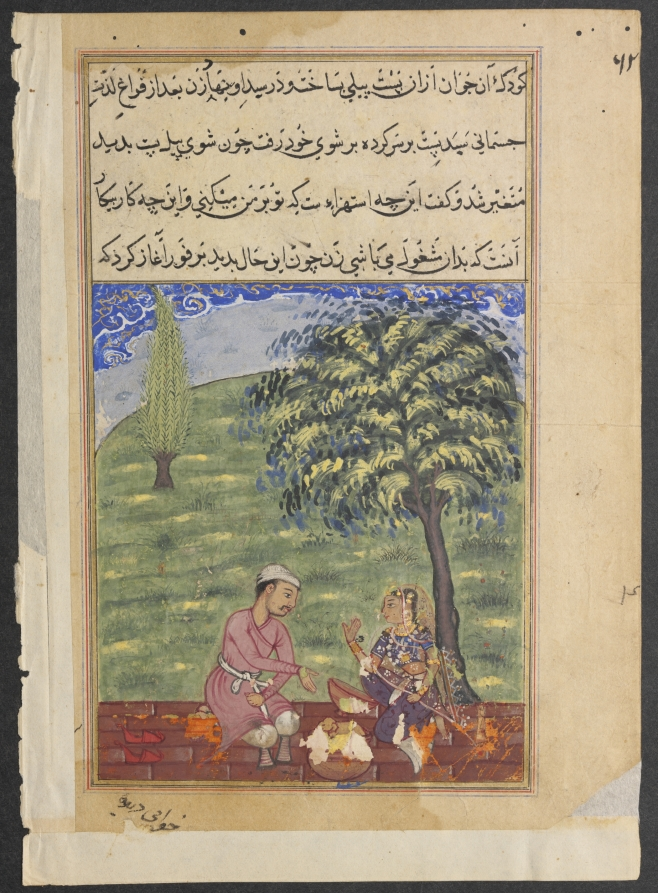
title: The unfaithful wife explaining away the presence of the dough elephant, from a Tuti-nama (Tales of a Parrot): Eighth Night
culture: Mughal India, court of Akbar (reigned 1556–1605)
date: c. 1560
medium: gum tempera, ink, and gold on paper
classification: Painting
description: A woman who has just committed adultery on the way to bring her husband his meal must explain why she fashioned his pastry into the shape of an elephant. She was not aware that her lover’s son had done this, but thinking quickly, she explained that she had a dream that eating the elephant would protect him from danger. He accepts this lie and thanks his wife for her kindness.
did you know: The wife wears Indian dress, but the husband wears Central Asian Mughal dress.